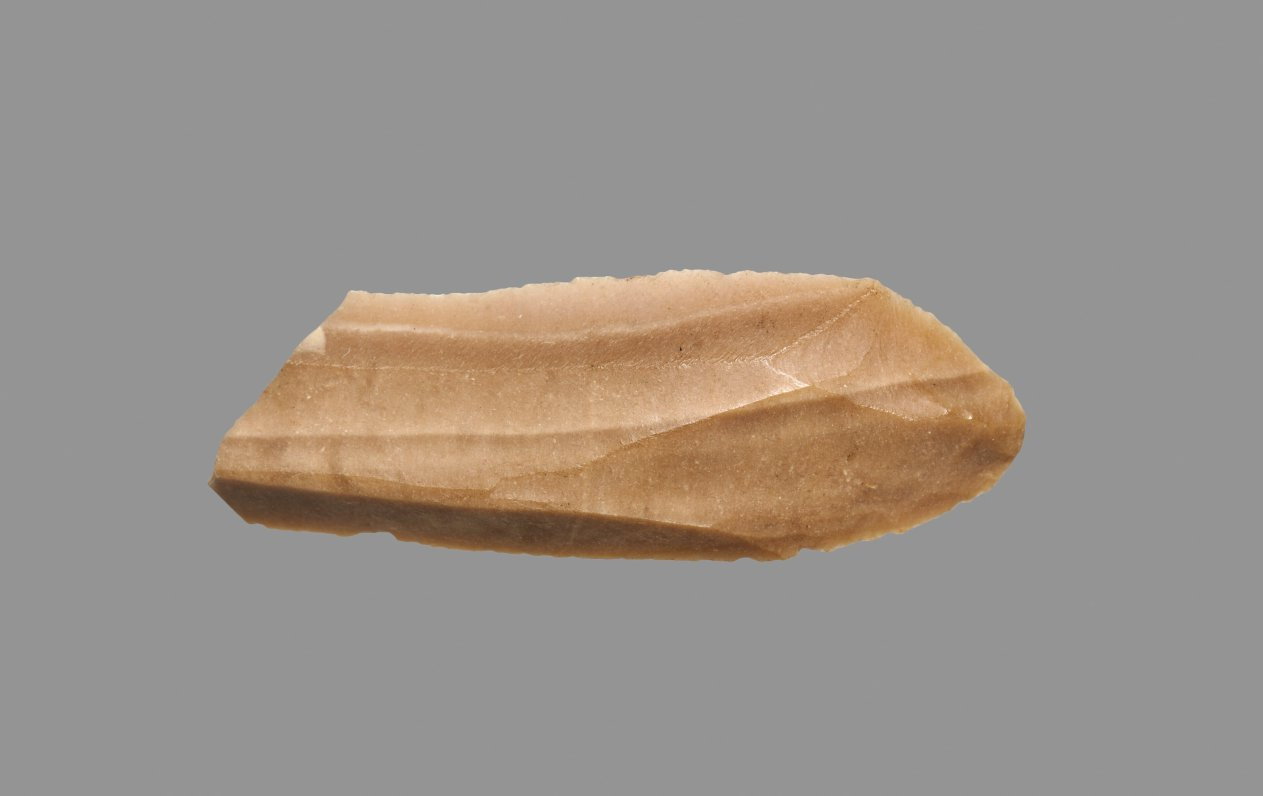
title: Sickle Blade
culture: Egypt, Middle Kingdom (2040–1648 BCE), Dynasty 12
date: 1980–1801 BCE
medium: flint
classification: Implements